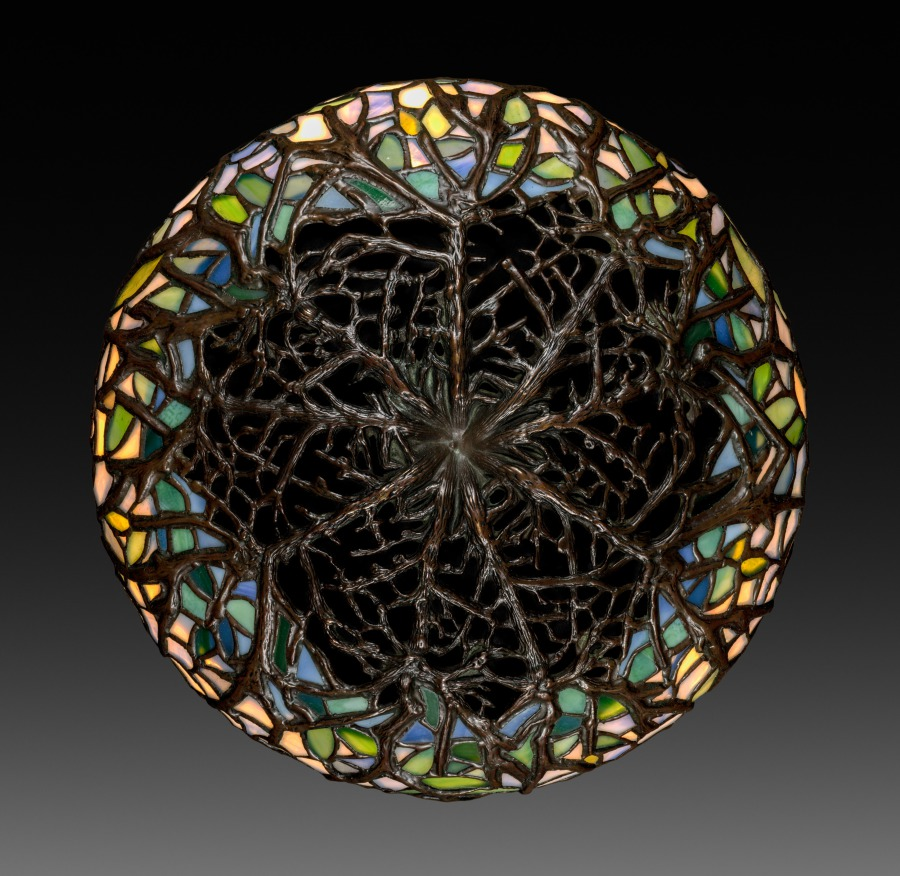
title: "Pony" Wisteria Lamp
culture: America, New York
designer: Clara Wolcott Driscoll (American, 1861–1944)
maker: Tiffany Studios (United States, New York, 1902–32)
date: c. 1902–10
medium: leaded glass, bronze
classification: Lamp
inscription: Base impressed: TIFFANY STUDIOS/NEW YORK/7002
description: The dawn of the 20th century spurred fresh approaches to design. Louis Comfort Tiffany’s great contribution to this new art movement, termed the Art Nouveau, was not only the shimmering iridescence of his Favrile glass but also the naturalistic compositions of his lamps and windows, which brought him commercial and critical success in both Europe and America. The artistic blend of sculpture and function in the Wisteria lamp, in which the base rises up to form the branches of the vine, became a hallmark of Tiffany's Art Nouveau production. This lamp, designed by Clara Wolcott Driscoll, Tiffany's chief lamp designer, won a grand prize for Tiffany Studios at the 1902 international exposition in Turin, Italy.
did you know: This small version of the Wisteria Lamp was called a "pony" by Tiffany and his artisans.